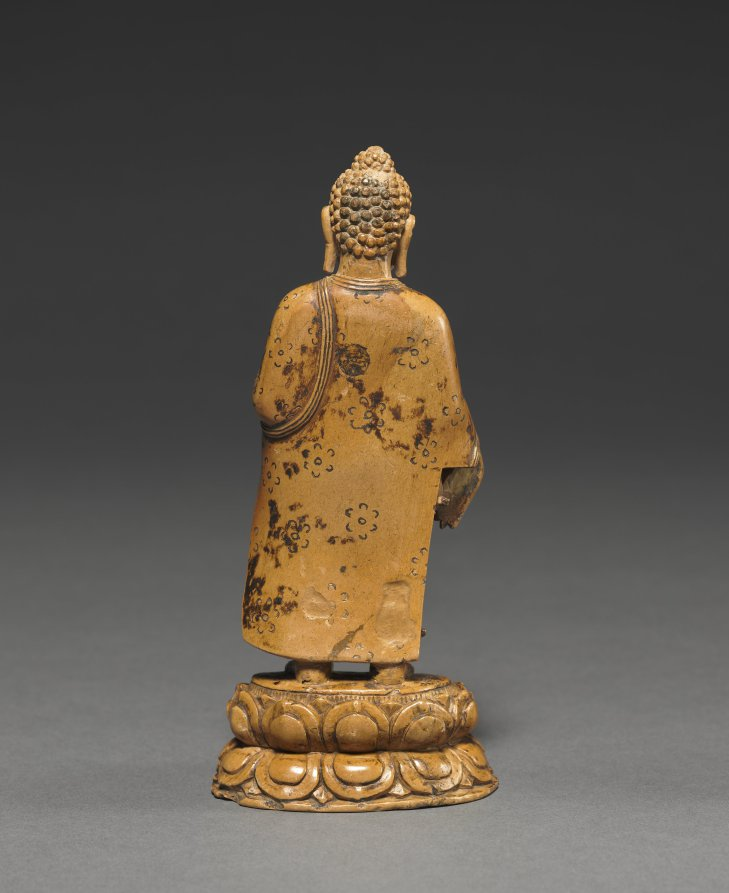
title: Standing Buddha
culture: Burma (Myanmar)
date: c. 800s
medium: Kaolin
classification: Sculpture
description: This small sculpture was probably part of a set of eight main scenes from the life of the Buddha, each identified by a specific hand gesture. When the standing Buddha gestures down with his right hand, with the palm facing out, he usually signals his miraculous descent from the Heaven of the Thirty-three Gods, where he once spent a monsoon season giving teachings to his mother. She died shortly after his birth and was reborn in the heaven.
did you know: The robe is covered with flowers on the front and back, possibly alluding to the flowers falling from heaven as the Buddha descended back to earth.